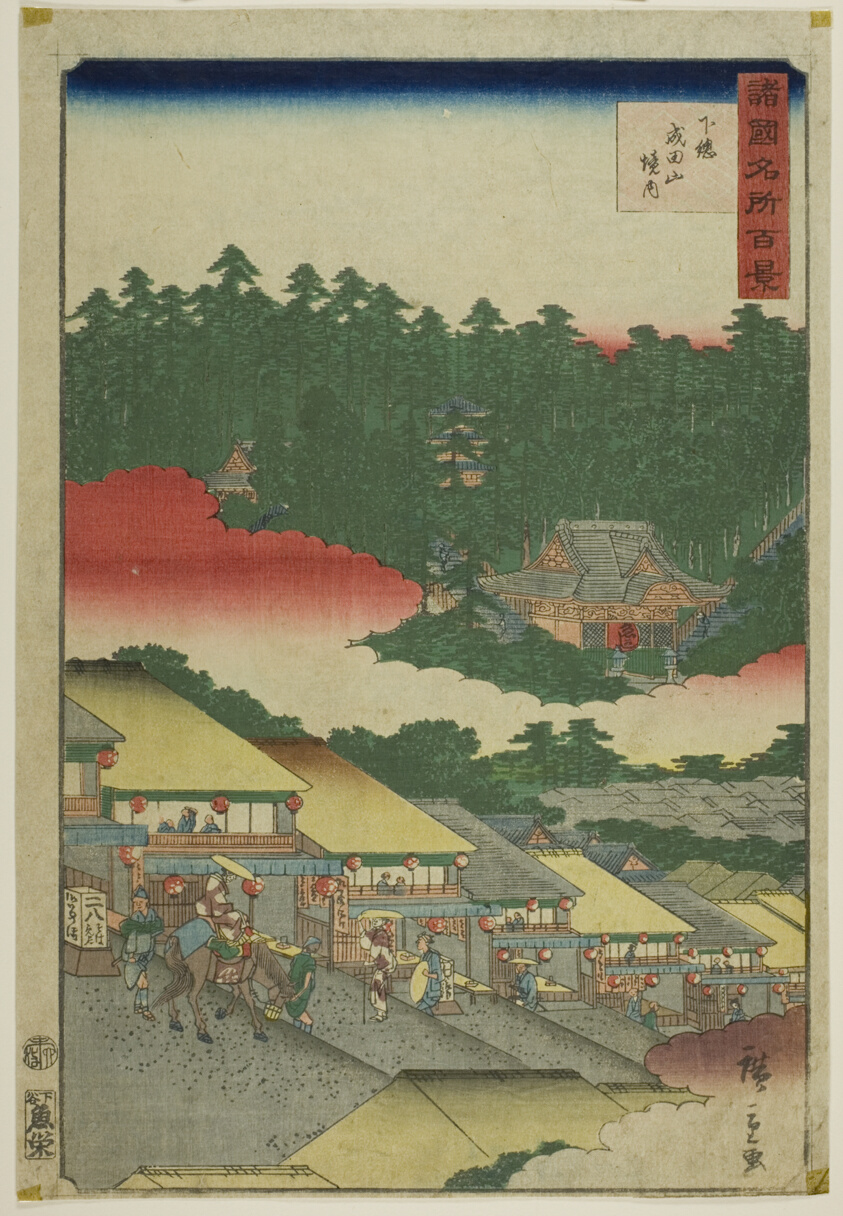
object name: Print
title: The Compound on Mount Narita, Shimosa Province (Shimosa Naritasan keidai) from the series “One Hundred Famous Views in the Various Provinces (Shokoku meisho hyakkei)”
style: Japanese (culture or style)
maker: Utagawa Hiroshige II (Shigenobu) (Japanese, 1826–1869)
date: 1859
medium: Color woodblock print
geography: Japan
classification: woodblock print; print